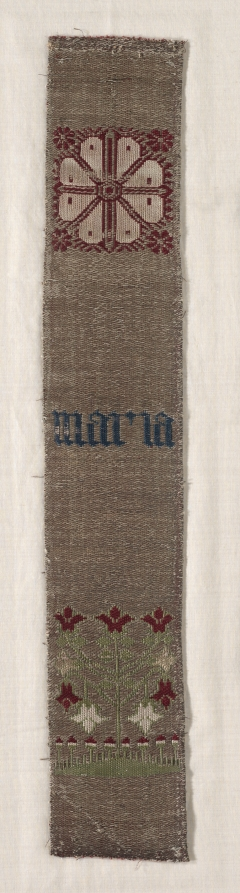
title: Fragment of a Band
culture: Germany, Cologne, 14th-15th century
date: 1300s–1400s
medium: Linen, silk, metal-wrapped thread: compound twill weave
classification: Textile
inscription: across center of band is inscription: "MARIA."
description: The Cleveland Museum of Art has a number of band fragments that may have been created in a workshop in Cologne, Germany, on the Rhine River. They may have been produced in series and could be adapted for various contexts. Such bands are found, for example, in very similar form on the nearby chasuble, or sleeveless outer vestment. The inscriptions Jesus and Mary on the bands also point to such a use.